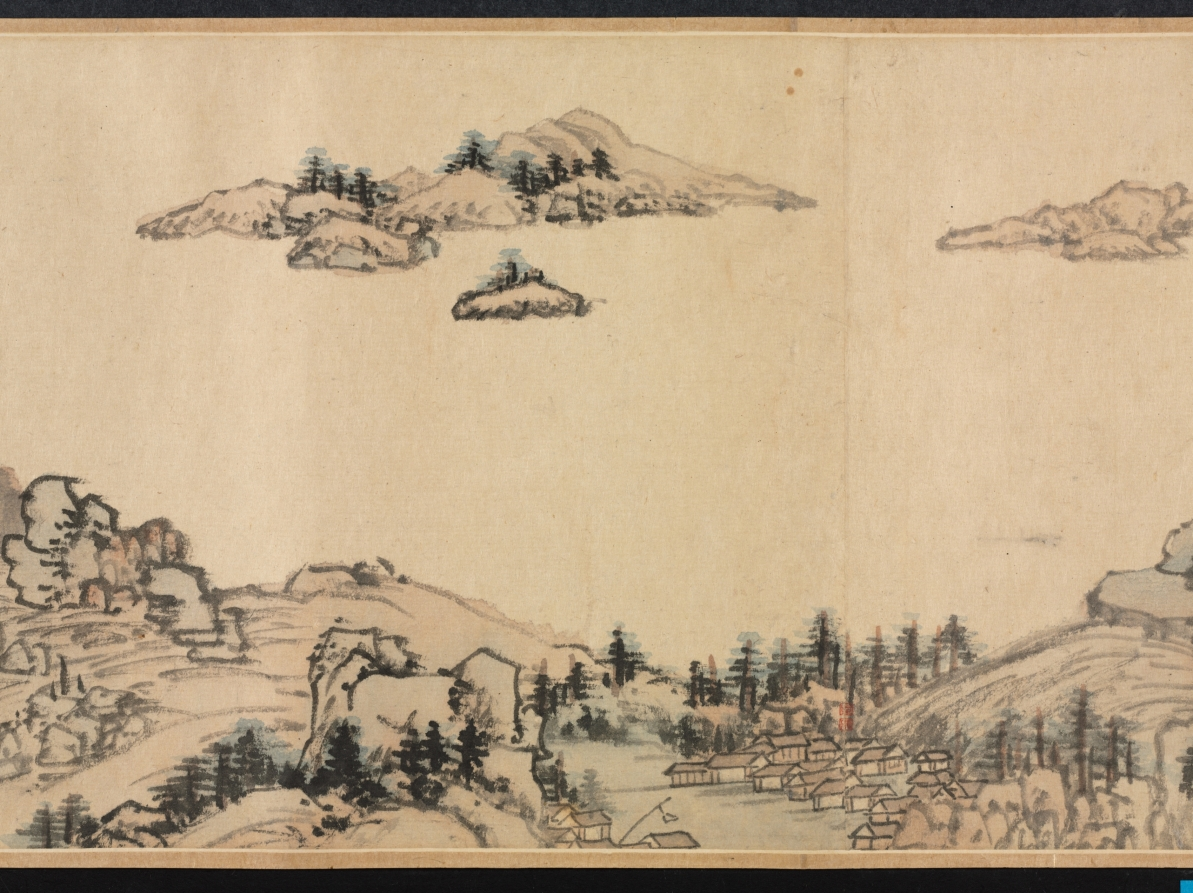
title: Dream Journey among Rivers and Mountains, no. 90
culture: China, Qing dynasty (1644-1911)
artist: Cheng Zhengkui (Chinese, 1604–1676)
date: 1658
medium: Handscroll; ink and color on paper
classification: Painting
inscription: 江山臥遊圖其九十, 青溪道人, 戊戌夏五。 [印] 程正揆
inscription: Title and inscription by Huang Yi 黃易 (1744–1802), and 3 seals.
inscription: 1 colophon and 9 additional seals: 3 seals of Dai Zhi 戴植 (active about 1821–1850); 1 colophon, dated 1914, and 3 seals of Yan Shiqing 顏世清 (1873–1929); 3 seals of Wang Nanping 王南屏 (1924–1985).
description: Cliffs and waterfalls interspersed with trees and dotted vegetation are spread over this handscroll. Long paths wind their way through villages, beside cottages, shrines, and over bridges. In the past, Chinese literati officials liked to take a “dream journey” along mountains and rivers when viewing landscape paintings in their studios. Scenery of this kind thus became a way to escape from the world of bureaucracy and administration. The painter Cheng Zhengkui used the title “Dream Journey” for a whole series of paintings, of which this is number 90. He is said to have painted 500 of them, but the actual count remains unknown.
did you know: Cheng Zhengkui planned to make 100 dream journey paintings but may have ultimately made 500.